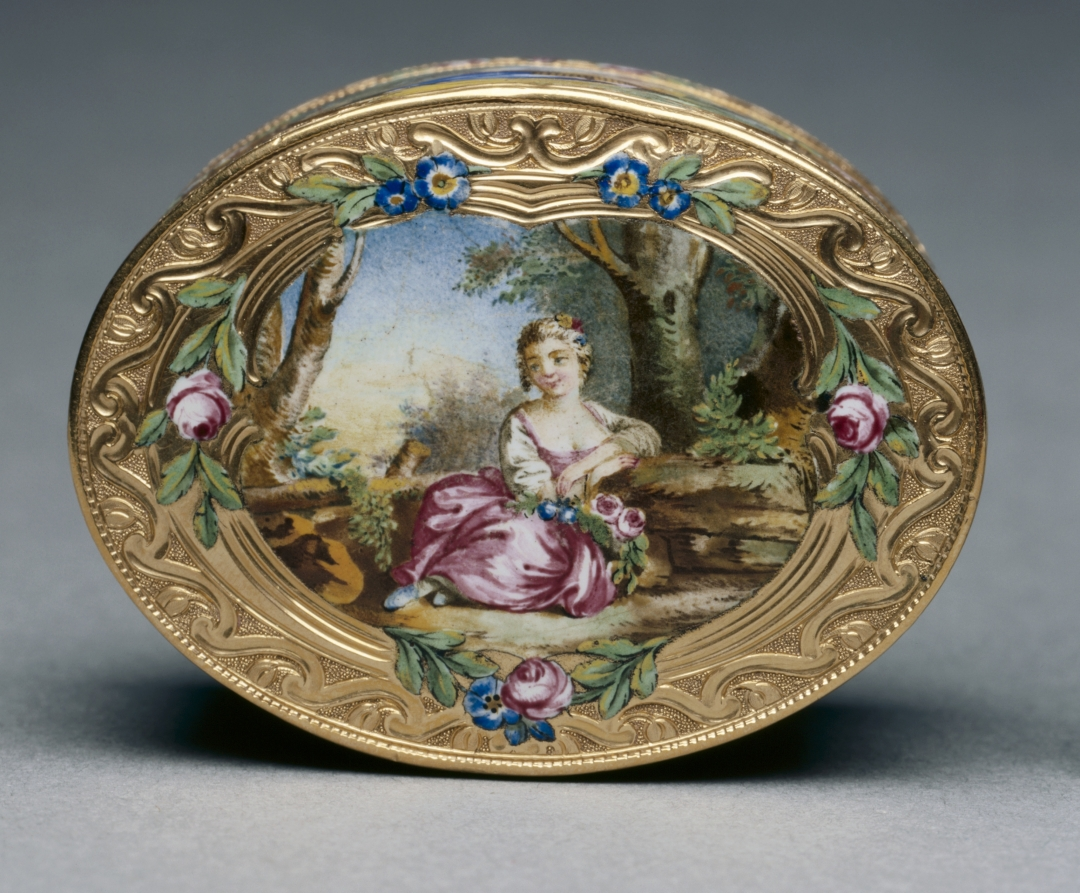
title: Snuff Box (Tabatière)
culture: France, 18th century (style of Louis XV)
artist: Francois Guillaume Tiron (French)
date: 1761–62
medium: gold and enamel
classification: Miscellaneous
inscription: [Maker's mark of Francois-Guillaume Tiron, master goldsmith in 1747, inside cover]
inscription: [Warden's mark, Paris, 1761-1762, inside cover]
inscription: [Charge mark of Eloi Brichard and Etienne Somfoye, Paris, 1756-1762, inside cover]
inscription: [Maker's mark of Francois-Guillaume Tiron, inside bottom]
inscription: [Warden's mark, 1761-1762, inside bottom]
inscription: [Charge mark of Brichard and Somfoye, inside bottom]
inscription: [Maker's mark of FG Tiron, left wall]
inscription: [Charge mark of Brichard and Somfoye, left wall]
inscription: [Warden's mark, Paris, 1761-1762, left wall]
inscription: [Discharge mark of J.J. Prevost, Paris, 1762-1768, bezel at right]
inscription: [Engraved number, maybe retailer's number]: "n. 13676"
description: The pastoral scenes that decorate this box are typical of the style of François Boucher, a celebrated painter of the period whose works were popularly reproduced on decorative arts. Snuff boxes, used practically as containers for powdered tobacco, were often decorated with miniature reproductions of notable works. The miniature on the cover is inspired by Boucher’s The Galant Pastor (Le Pasteur Gallant) (1738) and that on the bottom by The Amusement of the Shepherd Girl (L’Amusement de la Bergère) (1700s).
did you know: François Boucher was a favorite of the French royal court of Louis XV and named first painter of the king in 1765.